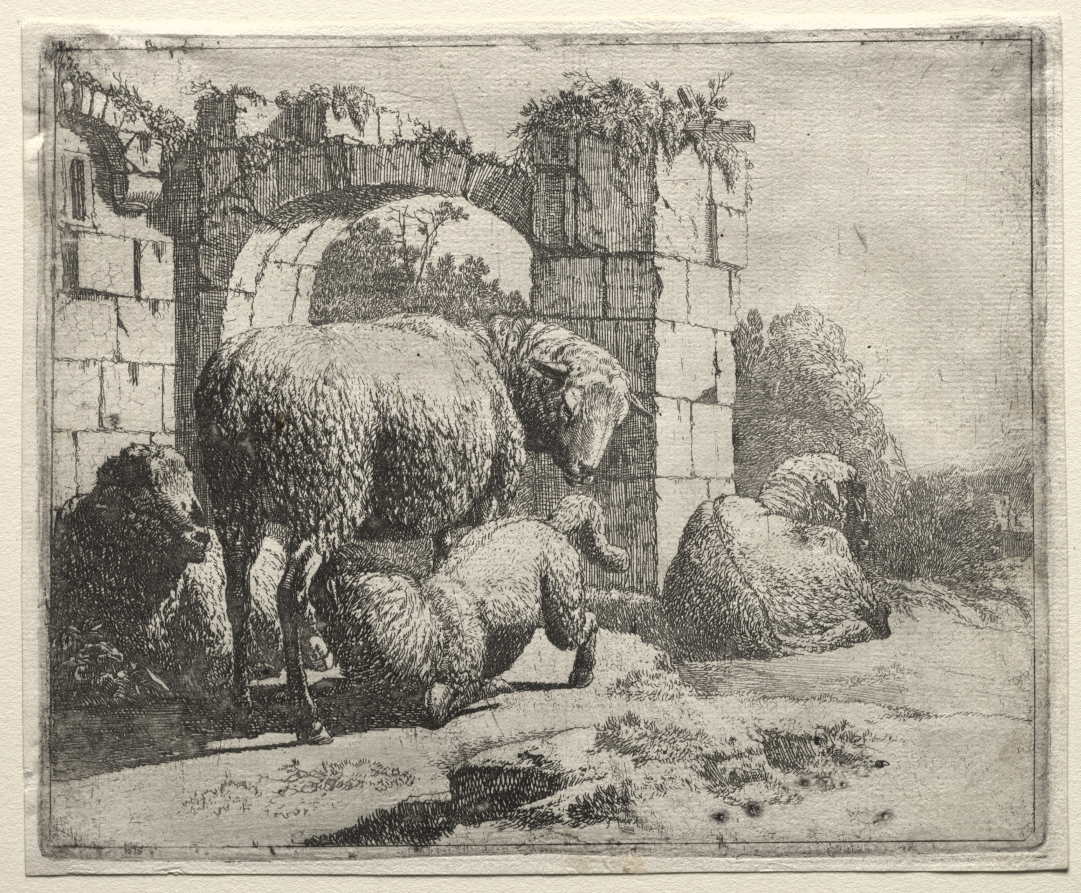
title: Sheep Near the Ruins of an Arch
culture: Germany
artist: Johann Heinrich Roos (German, 1631–1685)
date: 1665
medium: etching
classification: Print